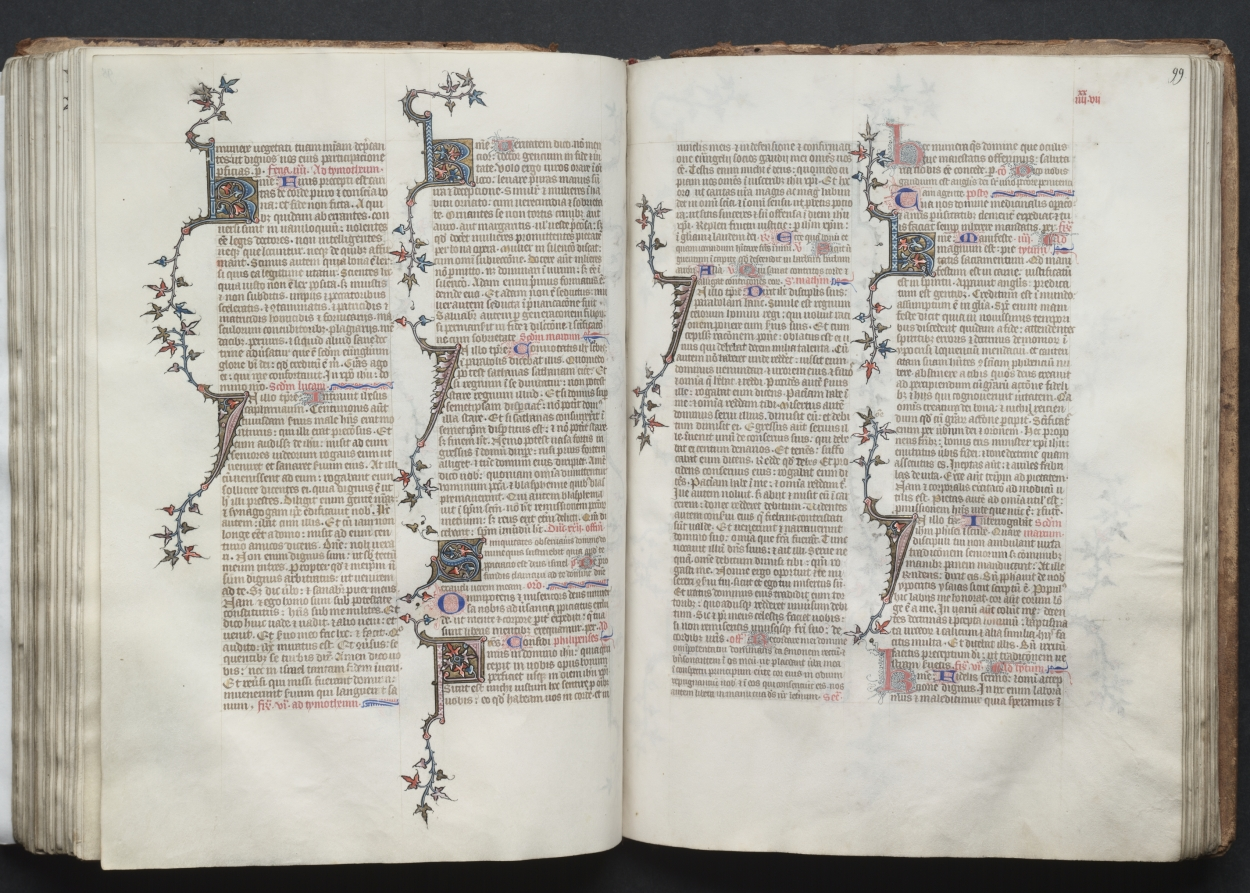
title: The Gotha Missal: Fol. 99r, Text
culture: France, Paris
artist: Master of the Boqueteaux (French)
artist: and Workshop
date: c. 1375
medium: ink, tempera, and gold on vellum; blind-tooled leather binding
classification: Bound Volume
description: The style and quality of this manuscript's decoration is typical of deluxe Parisian books made for aristocratic or royal patrons. Most of the book's decoration appears to be the work of the Master of the Boqueteaux, an artist active at the court of King Charles V (died 1380). His style was apparently shared by a number of book illuminators working in and around Paris. It is very possible that the Gotha Missal belonged to Charles V, but is not provable because the manuscript has no royal portraits and lacks a colophon. Given the book's magnificent decoration, however, it would seem that it was produced for a Valois prince, if not for the king himself. The manuscript receives its name from the German dukes of Gotha, its later owners.